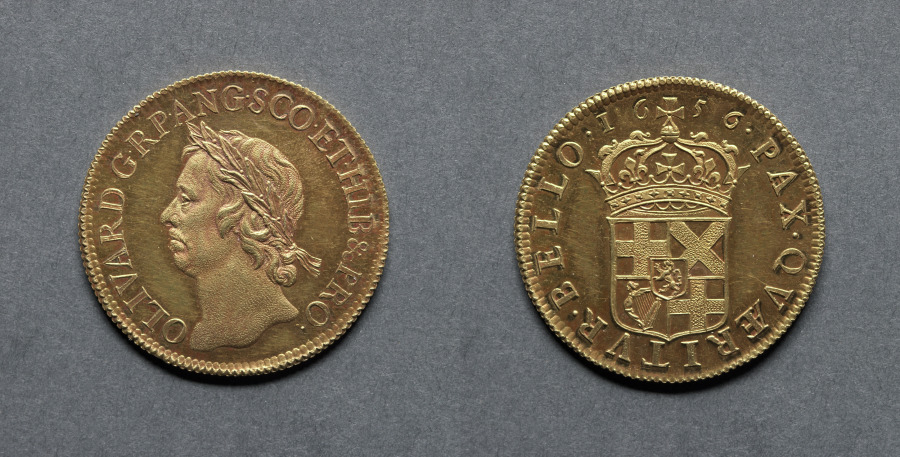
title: Broad: Oliver Cromwell Lord Protector (obverse); Crowned Shield of Arms (reverse)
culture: England, Oliver Cromwell, Lord Protector, 1653-1658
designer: Thomas Simon (British)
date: 1656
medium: gold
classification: Coins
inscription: PAX QVÆRITVR BELLO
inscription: OLIVARD G RP ANG SCO ET HIB&PRO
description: With the defeat of Charles I a Council of State was set up, the kingship abolished and England was governed as a Commonwealth. This rare piece was one of a series struck by order of Cromwell, and with the consent of the Council. The dies were made by Thomas Simon and the striking of the coins was entrusted to Peter Blondeau, who made use of the mill and screw press, which he had imported and improved. Public opinion appears to have been against Cromwell using his own portrait on the coinage and these pieces were not put into circulation, though even so they occasionally appear in somewhat worn condition. The laurel wreath and the crown are significant as there was a movement to offer Cromwell the Crown of England.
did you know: Thomas Simon was one of the great medallists of history and chief engraver at the Royal Mint although he left the regular work to his deputies and spent most of his time on commemorative medals.